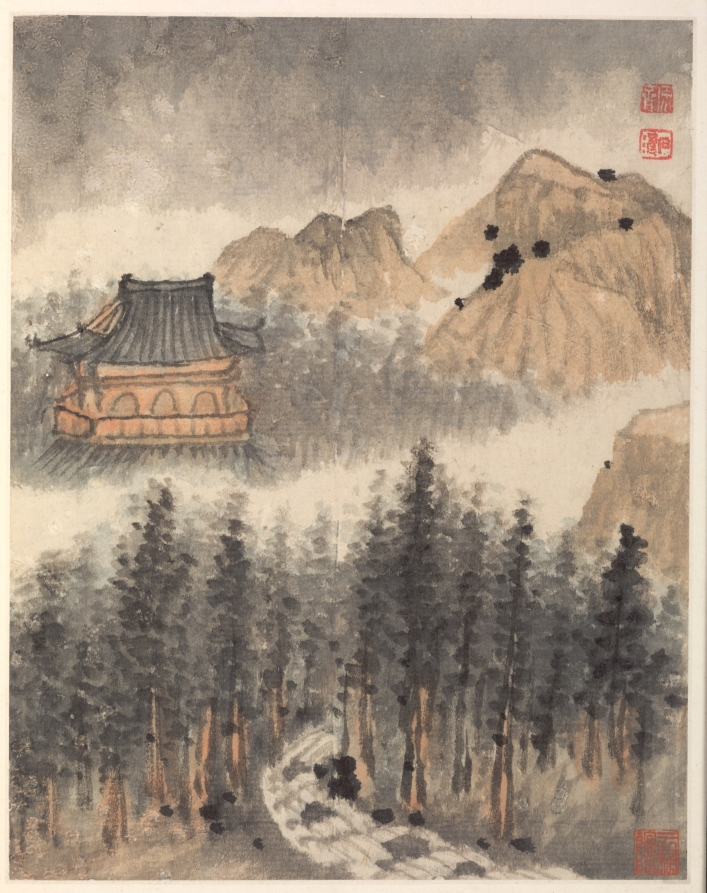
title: Reminiscences of Qinhuai River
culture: China, Qing dynasty (1644-1911)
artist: Shitao (Chinese, 1642–1707)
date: 1642–1707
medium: album leaf, ink and color on Song paper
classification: Painting